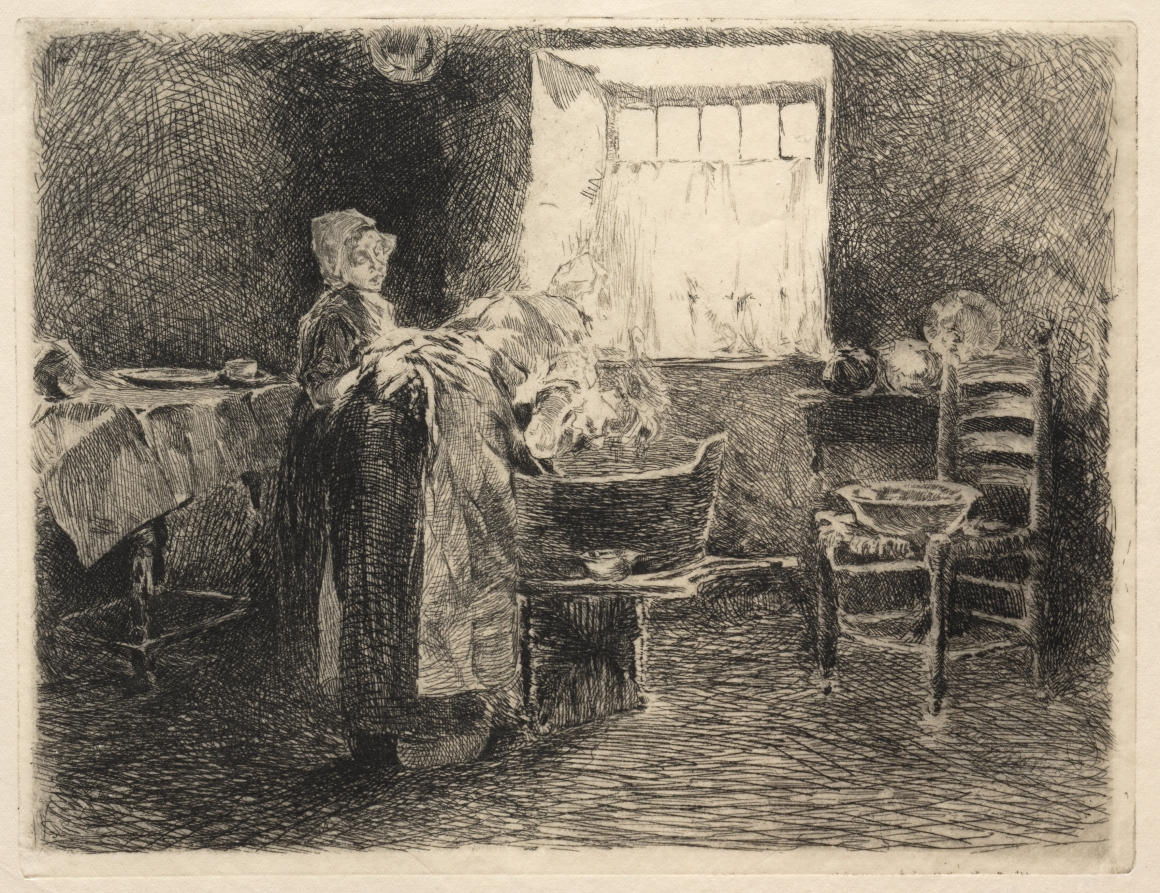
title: Monday Morning, Holland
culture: America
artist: Robert Frederick Blum (American, 1857–1903)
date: 1800s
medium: etching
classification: Print